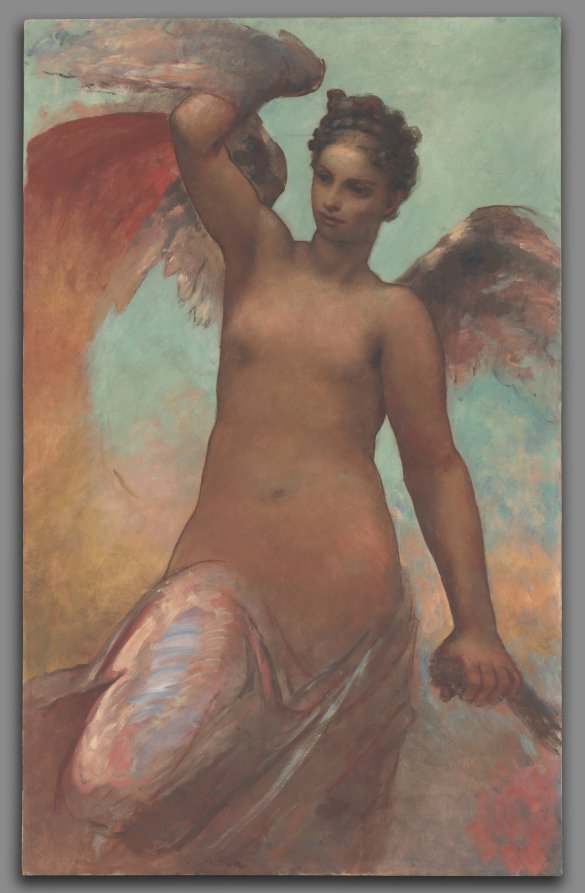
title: Winged Fortune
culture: America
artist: William Morris Hunt (American, 1824–1879)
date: 1878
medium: oil on canvas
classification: Painting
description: This painting is a full-size study for one of the figures in The Discoverer, a mural that William Morris Hunt painted on the vaulted roof of the Assembly Chamber at New York's state capitol in Albany. The mural showed Christopher Columbus standing boldly in a boat facing west. Winged Fortune stood behind him, her left hand holding the rudder as her right hand spread the sail. Hope sat in the bow, Science held a navigational chart, and Faith, covering her eyes, swam blindly ahead. Hunt only had two months to paint the murals, making many preparatory studies like this one. Not long after Hunt's death, massive leakage and cracking began to destroy the murals, which he had painted directly onto the wall. Eventually, a new ceiling was added to the chamber, concealing the murals completely.